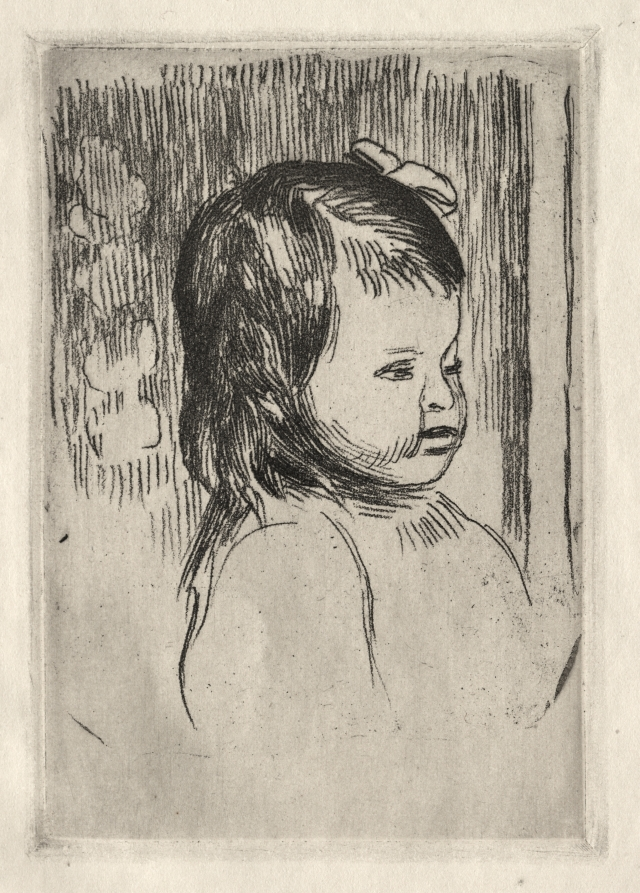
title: Child's Bust, Turned to the Right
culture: France, late 19th-early 20th century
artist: Pierre-Auguste Renoir (French, 1841–1919)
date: c. 1908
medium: softground etching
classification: Print